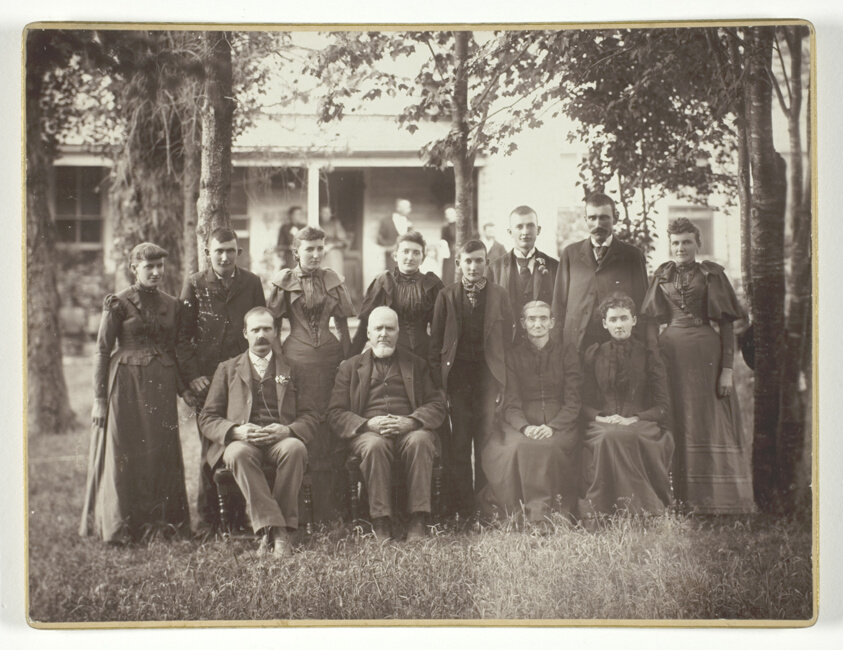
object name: Photograph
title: Untitled (Group Portrait of Twelve)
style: 19th century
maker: Artist unknown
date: 1890s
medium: Toned gelatin silver print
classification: photograph; photography